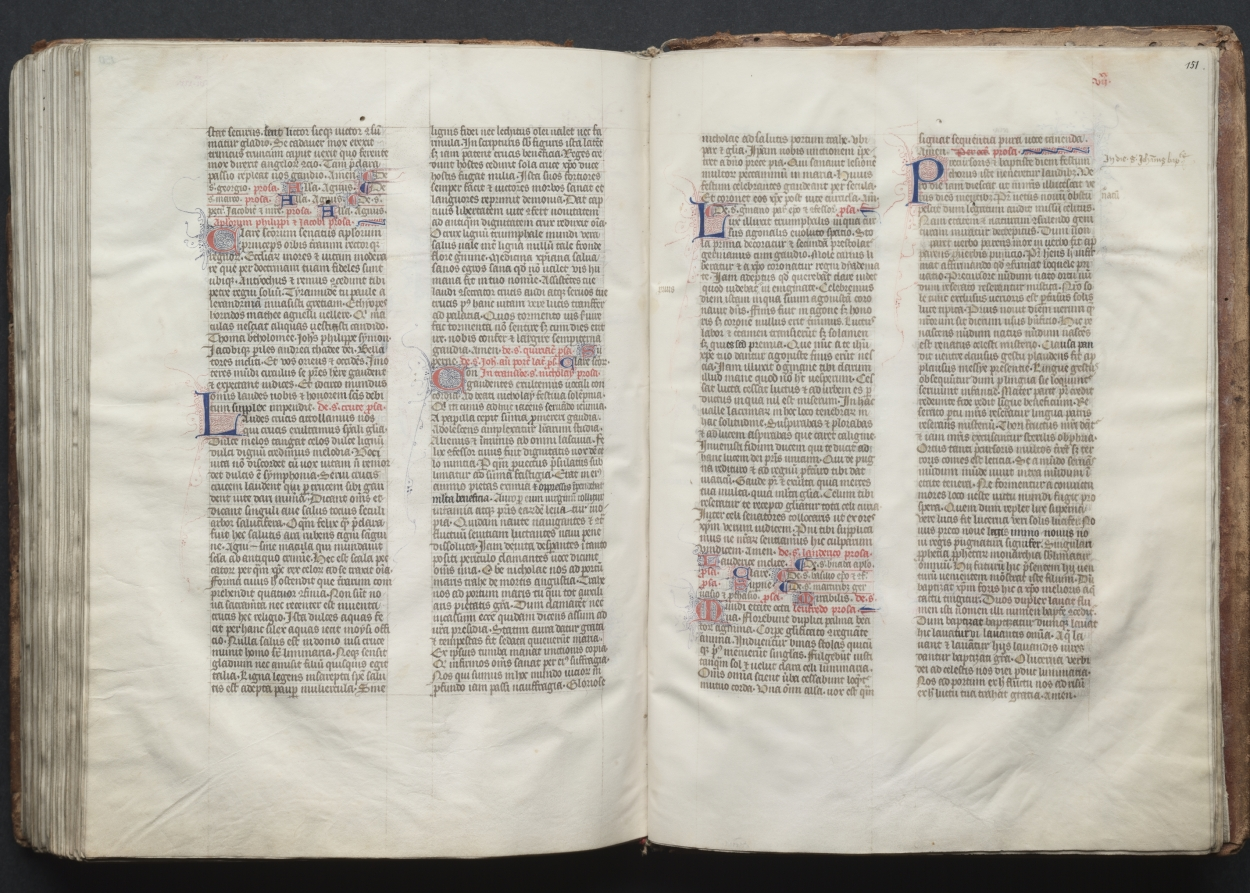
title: The Gotha Missal: Fol. 151r, Text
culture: France, Paris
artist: Master of the Boqueteaux (French)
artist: and Workshop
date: c. 1375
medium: ink, tempera, and gold on vellum; blind-tooled leather binding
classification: Bound Volume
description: The style and quality of this manuscript's decoration is typical of deluxe Parisian books made for aristocratic or royal patrons. Most of the book's decoration appears to be the work of the Master of the Boqueteaux, an artist active at the court of King Charles V (died 1380). His style was apparently shared by a number of book illuminators working in and around Paris. It is very possible that the Gotha Missal belonged to Charles V, but is not provable because the manuscript has no royal portraits and lacks a colophon. Given the book's magnificent decoration, however, it would seem that it was produced for a Valois prince, if not for the king himself. The manuscript receives its name from the German dukes of Gotha, its later owners.